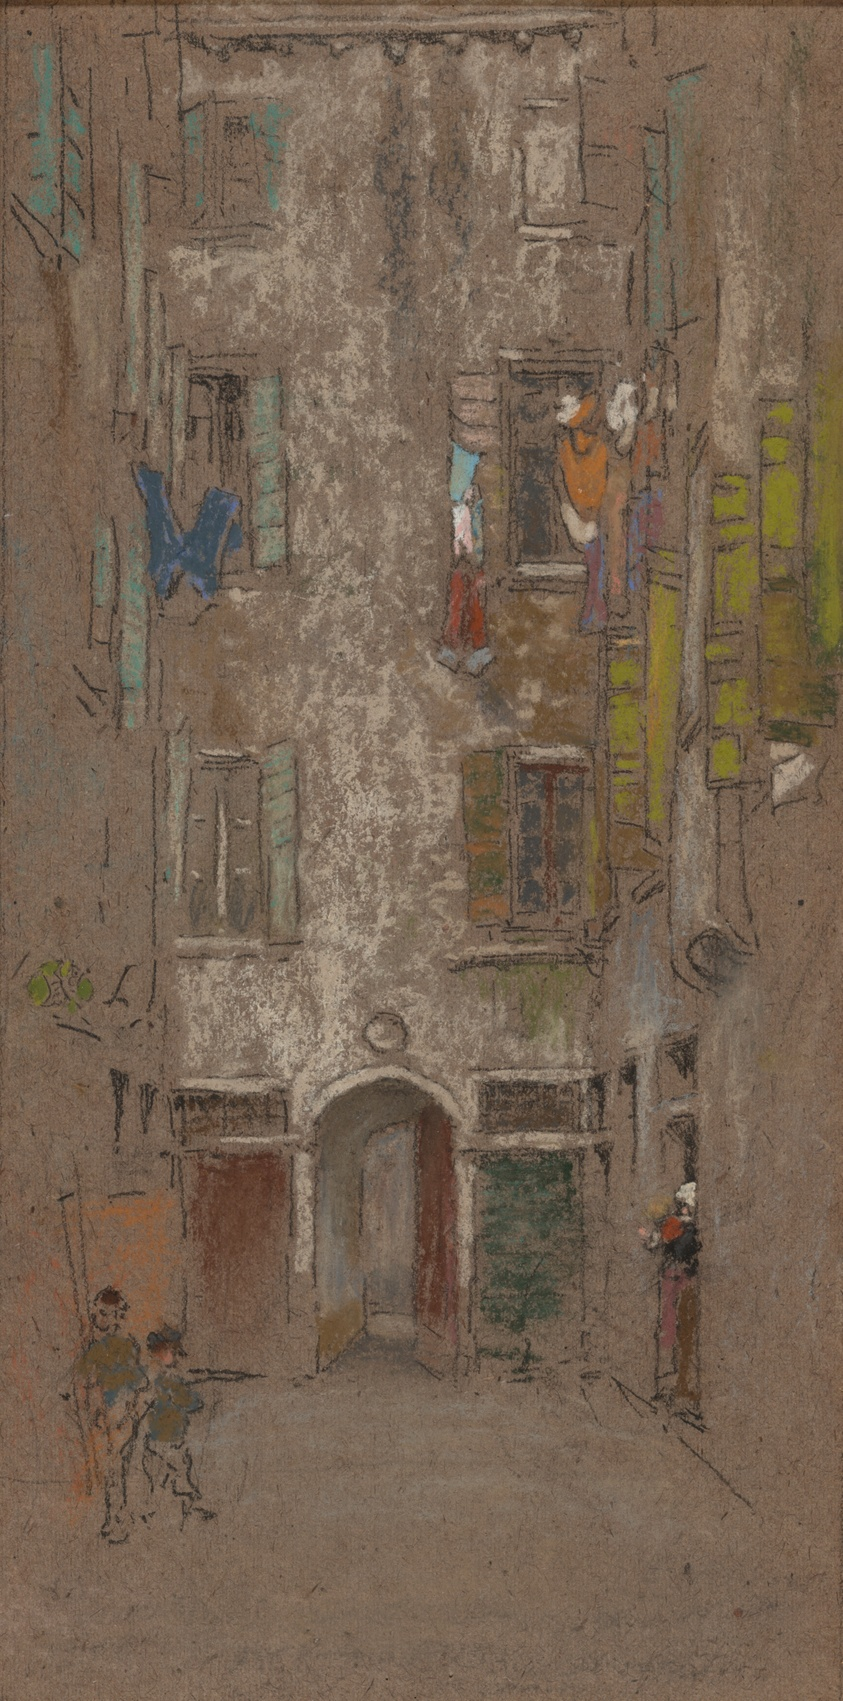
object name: Drawing and Watercolor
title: Corte del Paradiso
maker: James McNeill Whistler (American, 1834-1903)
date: 1880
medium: Pastel and black chalk on brown wove paper with fibrous inclusions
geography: United States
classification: pastel; drawings (visual works); prints and drawing; paper